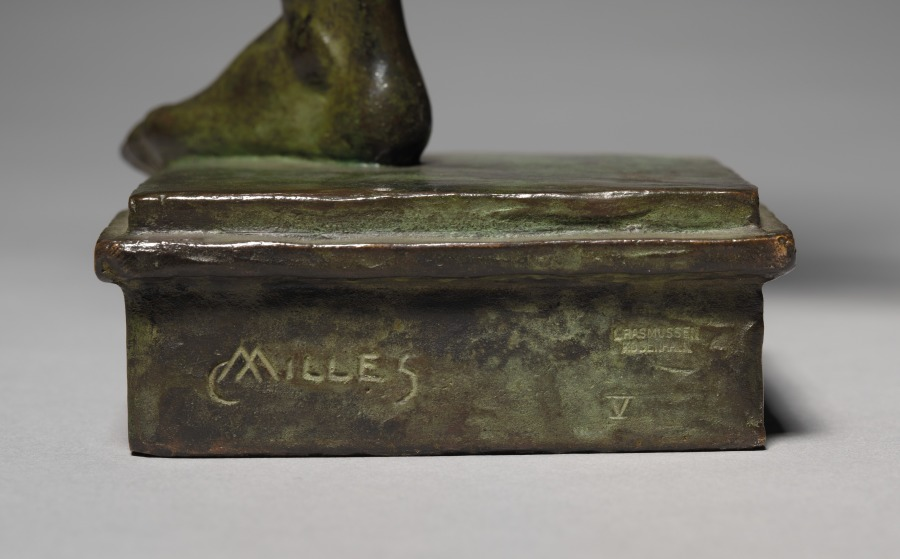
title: Diana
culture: Sweden, 20th century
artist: Carl Milles (Swedish, 1875–1955)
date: 1927–1928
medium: bronze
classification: Sculpture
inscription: Signed on back of base: "Milles"